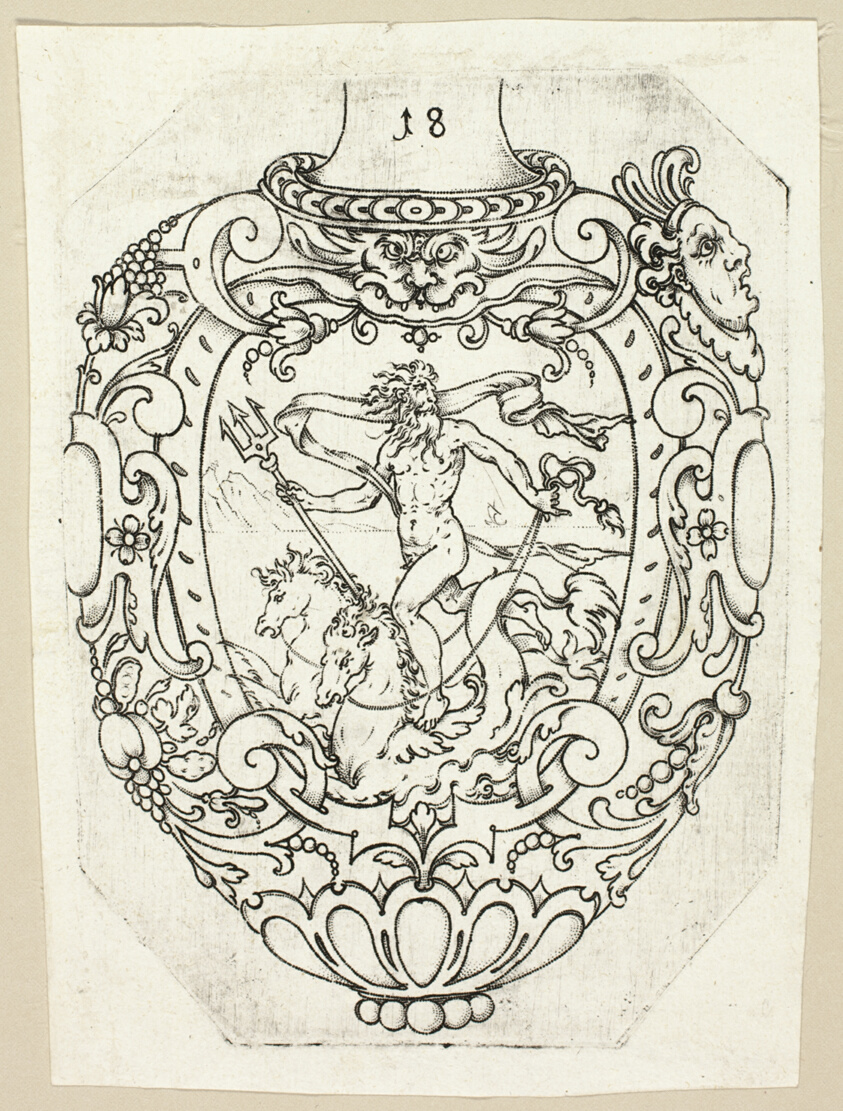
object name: Print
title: Plate 18, from twenty ornamental designs for goblets and beakers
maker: Master A.P. (German, active early 17th century)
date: 1604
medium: Punch engraving in black on ivory laid paper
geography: Germany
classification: engraving; print; prints and drawing